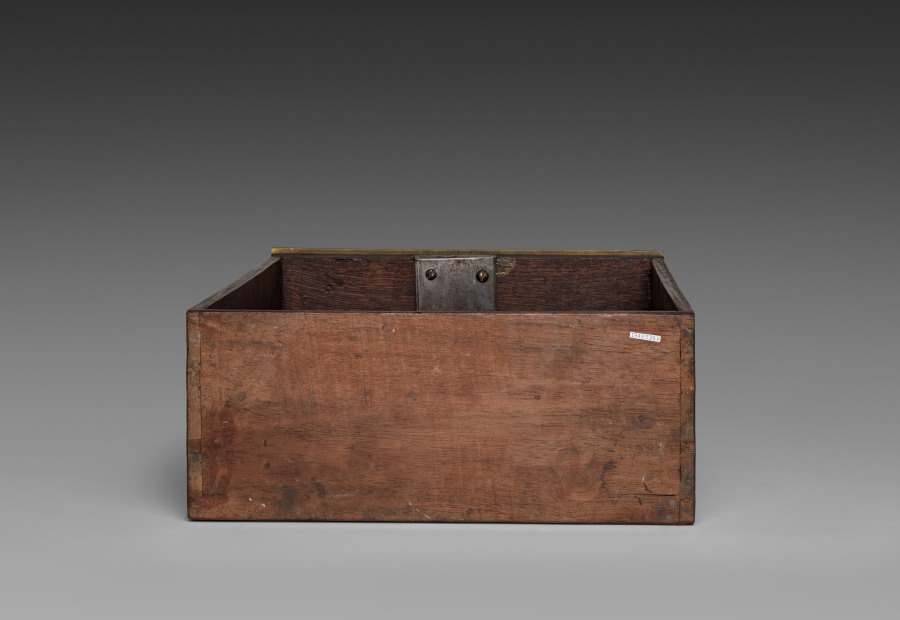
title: Side Drawer for Cabinet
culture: France, late 17th Century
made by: André-Charles Boulle (French, 1642–1732)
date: c. 1690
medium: ebony, marquetry in metal and tortoise shell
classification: Furniture and woodwork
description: Appointed cabinetmaker to King Louis XIV in 1672, André-Charles Boulle became a master of furniture making in France during the late 1600s until his death in 1732. Known primarily for his use of marquetry, in which metal patterns are inlaid into tortoiseshell then applied within the veneered surface of the furniture, Boulle established a level of quality and craftsmanship few others could achieve. As a result, his work found favor at the royal court and among other aristocrats and diplomats eager to impress the king. The inclusion of a medallion depicting Louis XIV within the bronze decoration of this chest would have identified the owner with the royal court. Often exhibiting stout architectural proportions with elegant groups of inlaid motifs such as the parrot on the central panel of this chest, Boulle’s designs are an example of the intellectual fashion for contrasting ideas, materials, and motifs.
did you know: Originally designed to sit atop an elaborate tall stand, this chest was likely altered in the late 1700s to reduce its scale and height.